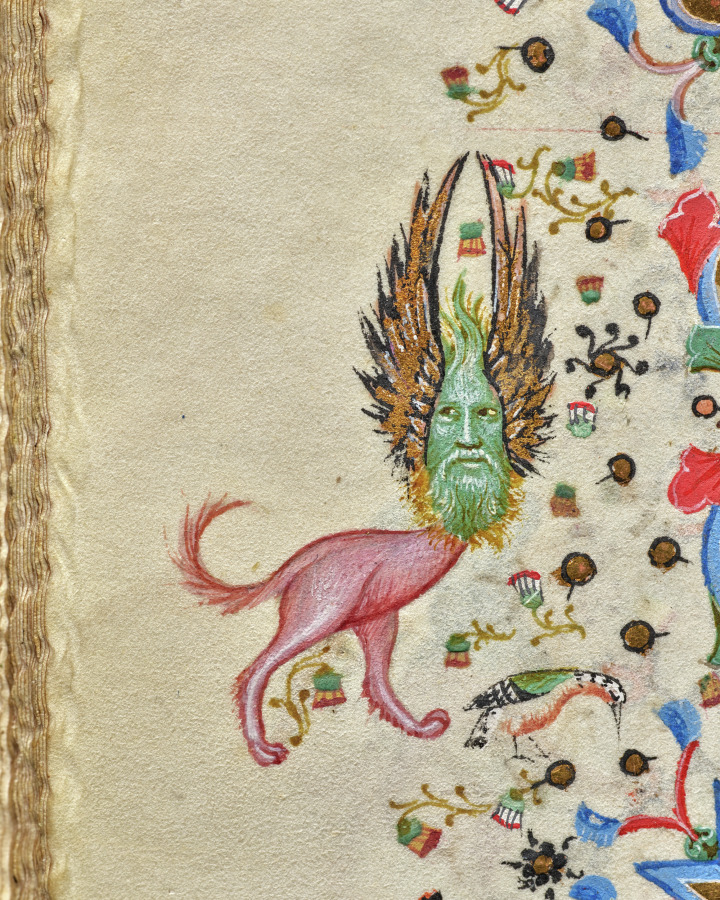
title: Hours of Charles the Noble, King of Navarre (1361-1425): fol. 280v, SS. Job and Eustace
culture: France, Paris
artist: Master of the Brussels Initials and Associates (French)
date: c. 1405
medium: ink, tempera, and gold on vellum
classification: Bound Volume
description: This precious volume was obviously highly prized by its owner, the French-born King of Navarre, who had his coat of arms painted on no less than twenty folios. Rather than directly commissioning this manuscript from a specific workshop, it seems that Charles the Noble acquired his book of hours -- perhaps ready-made for the luxury market -- while on a trip to Paris in 1404-05. A collaborative effort, six painting styles are evidenced within the pages of this codex, those of two Italians, two Frenchmen, and two Netherlanders. The painter who was responsible for the planning and decoration of the book, and who produced seventeen of the large miniatures, was a Bolognese artist known as the Master of the Brussels Initials. His principal assistant, responsible for most of the borders, was a Florentine who signed his name "Zecho" da Firenze on folio 208 verso.